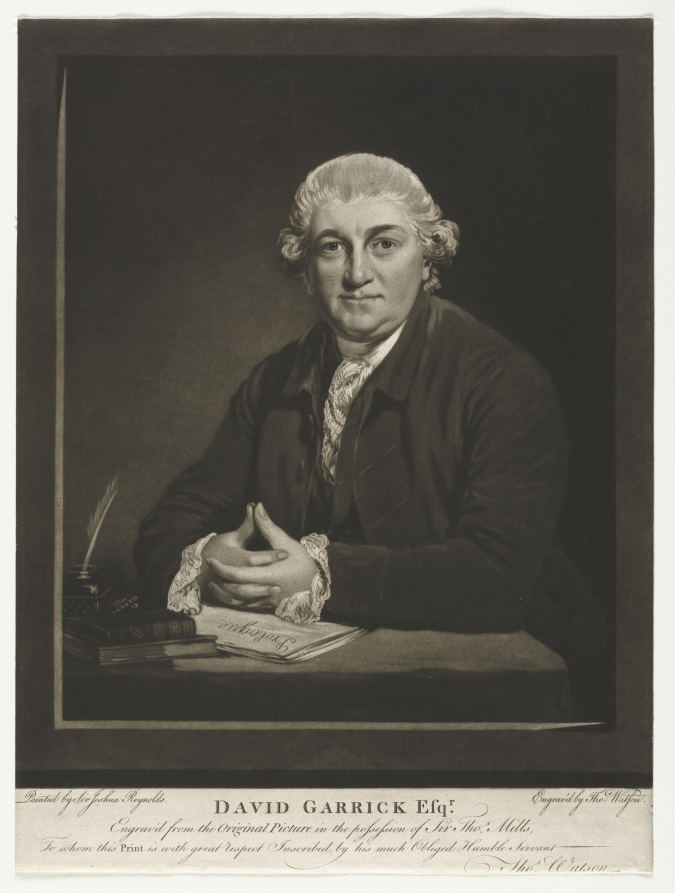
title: David Garrick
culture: England, 18th century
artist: Thomas Watson (British, 1743 (?)-1781)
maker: after Joshua Reynolds (British, 1723-1792)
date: 1779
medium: mezzotint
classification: Print